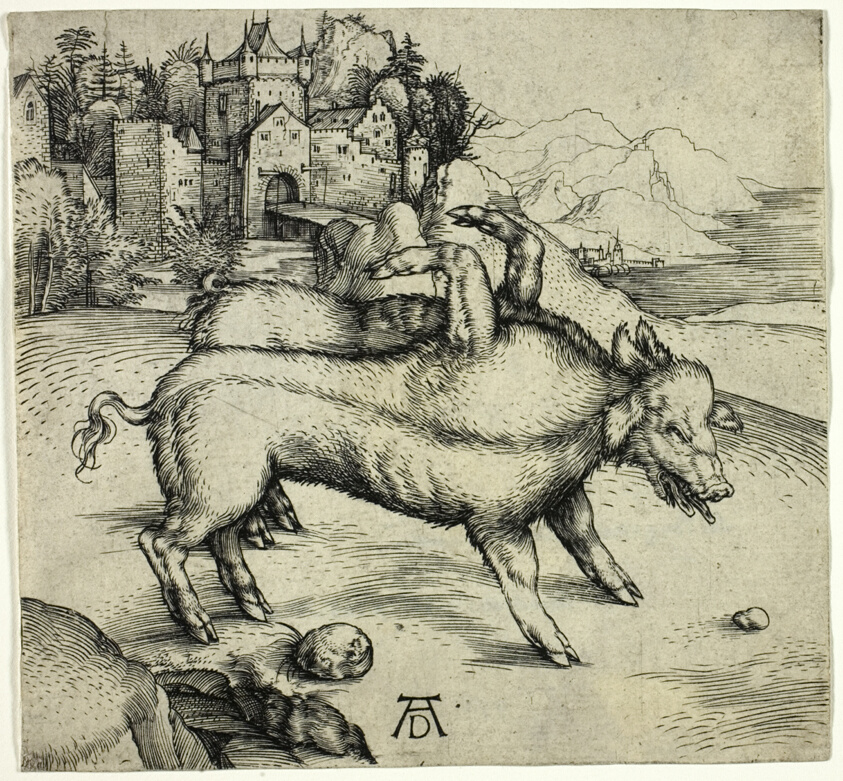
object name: Print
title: The Monstrous Sow of Landser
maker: Albrecht Dürer (German, 1471-1528)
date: 1496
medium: Engraving in black on ivory laid paper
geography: Germany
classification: engraving; print; prints and drawing; paper